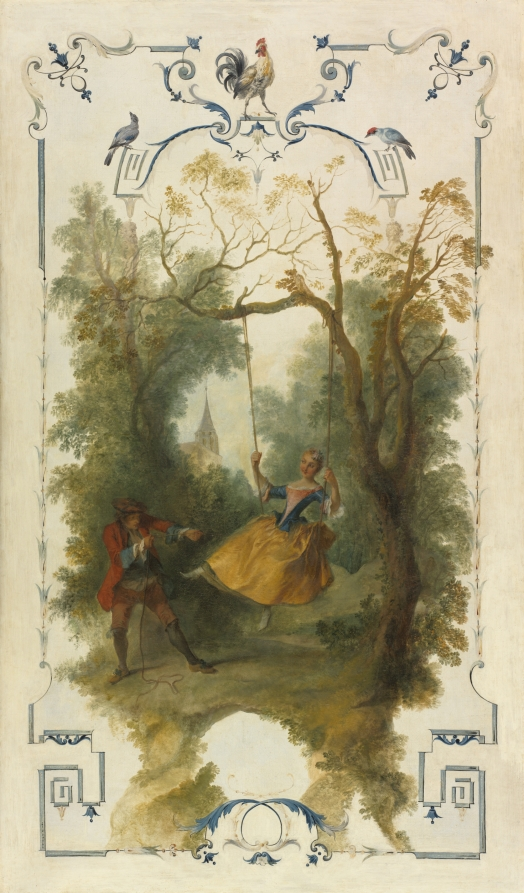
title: The Swing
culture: France, 18th century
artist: Nicolas Lancret (French, 1690–1743)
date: c. 1723–1727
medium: oil on canvas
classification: Painting